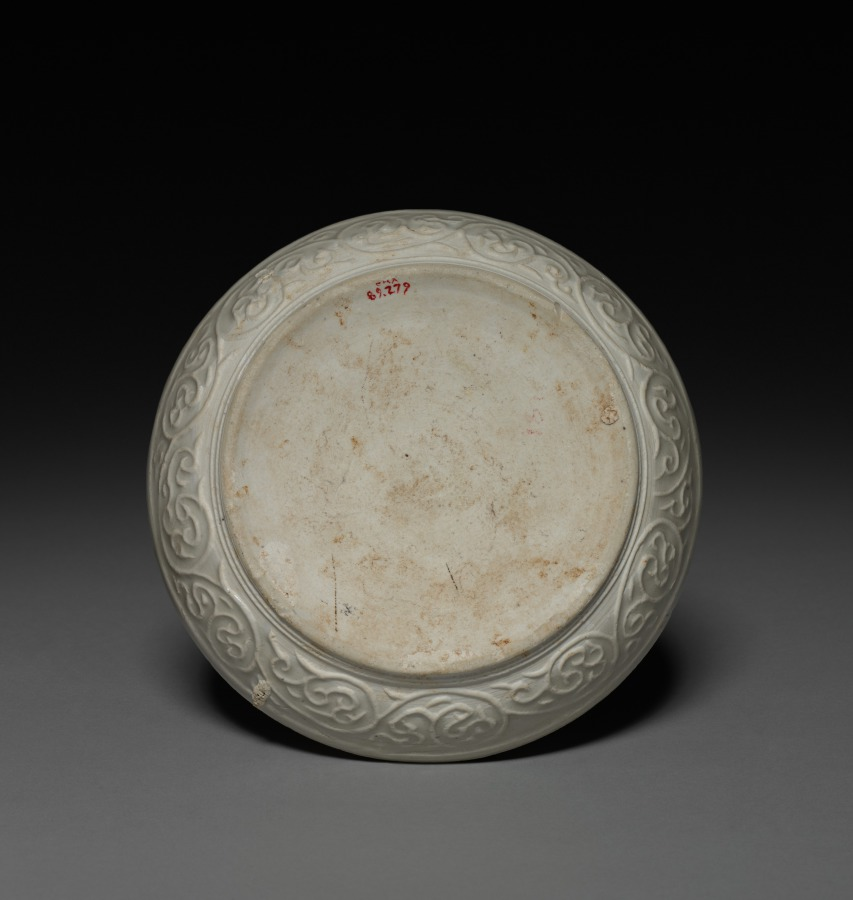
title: Round Covered Box with Floral Scrolls in Relief: Qingbai type Ware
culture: China, Fujian province, Anxi xian, Yuan dynasty (1271-1368)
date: 1300s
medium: glazed porcelain with slip decoration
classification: Ceramic